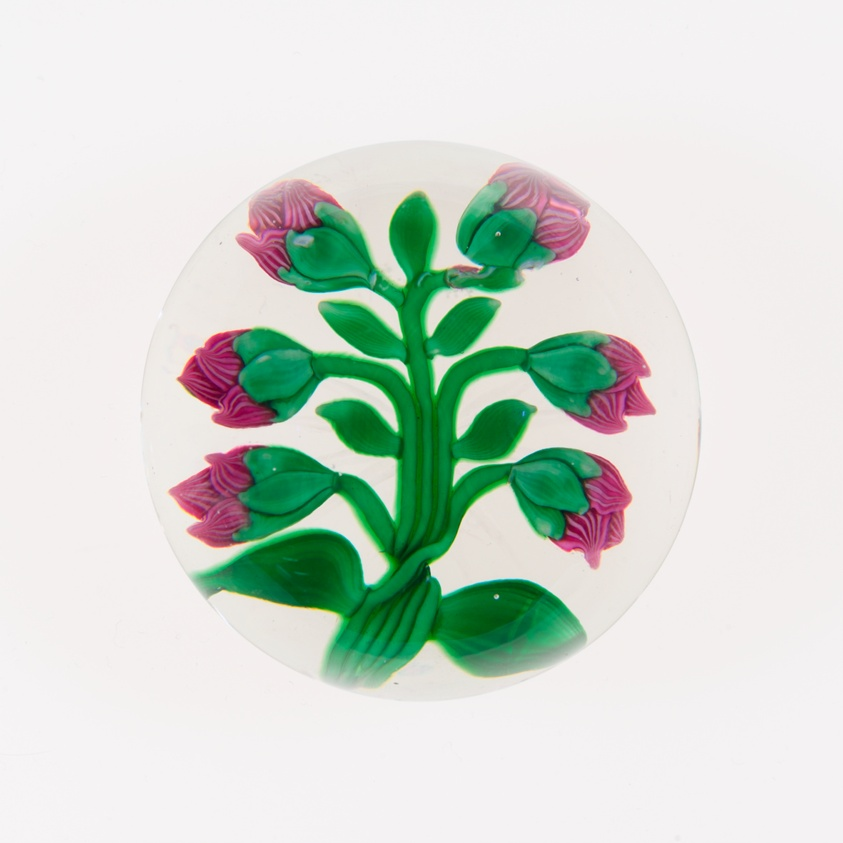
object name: Glass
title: Paperweight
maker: Baccarat Glassworks (Cristalleries de Baccarat); Lorraine, France, founded 1764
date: 19th century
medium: Glass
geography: France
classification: paperweight; glass